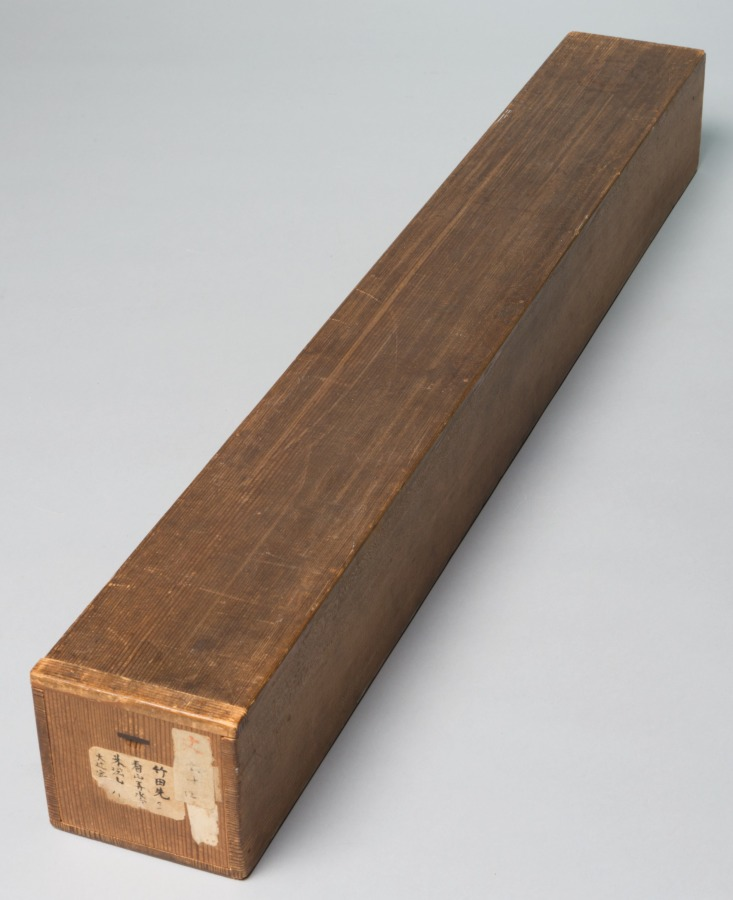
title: Mountain View and Blue Water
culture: Japan, Edo period (1615–1868)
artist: Tanomura Chikuden (Japanese, 1777–1835)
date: early 1800s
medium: hanging scroll; ink, color, and gold on paper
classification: Painting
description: Tanomura Chikuden was an eminent painter whose adopted son, Tanomura Chokunyū (1814–1907), was Seifū Yohei III’s painting teacher. This work was displayed at a gathering commemorating the 10th anniversary of Chokunyū’s death, something we know only because its custom-made box and archival documents have been carefully kept together. The box inscription also confirms that Chikuden was emulating the style of the Mi family of painters, active during China’s Southern Song dynasty (1127–1279). The painting’s Chinese-style silk wrapper is inscribed and sealed on its interior by members of Chokunyū’s community.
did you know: The mountain shapes are built up with multiple small wet strokes.